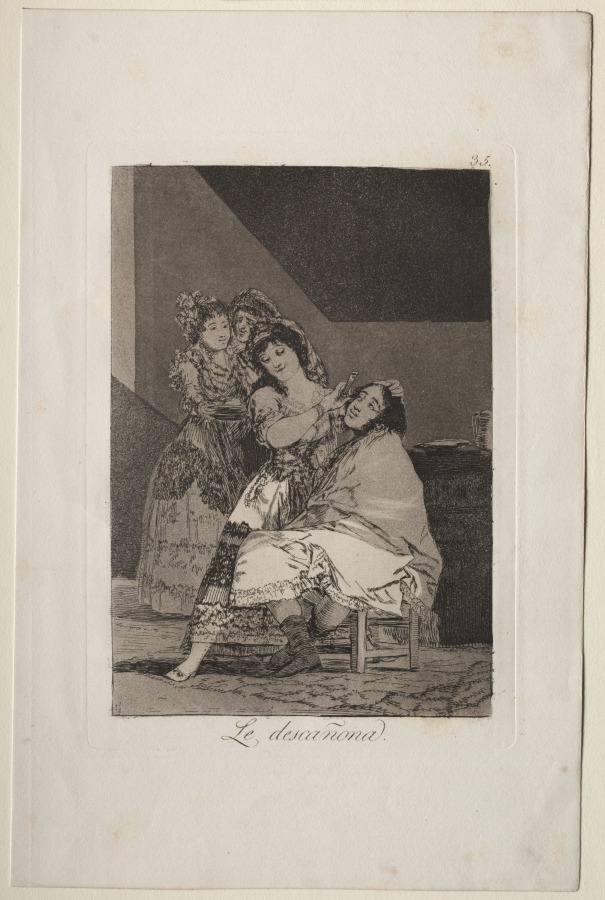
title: She Fleeces Him, Plate 35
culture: Spain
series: Los Caprichos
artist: Francisco de Goya (Spanish, 1746–1828)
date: 1799 (printed c. 1855)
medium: etching and aquatint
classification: Print